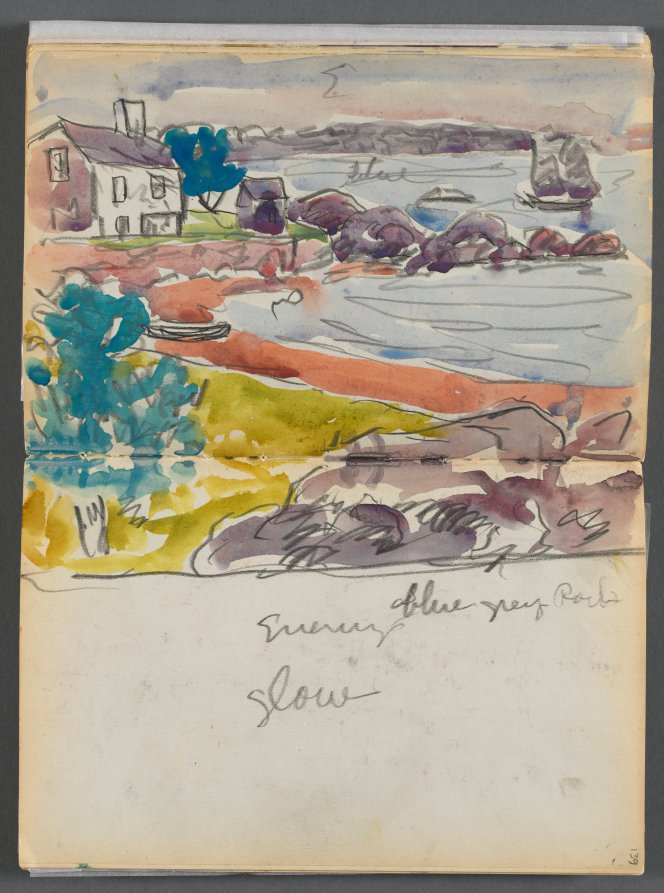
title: Sketchbook- The Granite Shore Hotel, Rockport, page 138 & 139: "Evening Glow"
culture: America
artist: Maurice Prendergast (American, born Newfoundland [now Canada], 1858–1924)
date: 1905–10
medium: graphite and watercolor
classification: Bound Volume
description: This sketchbook contains 72 pages of pencil drawings and 9 watercolors of Cape Ann. On the inside of the cover Prendergast wrote the address of the Granite Shore Hotel in Rockport, Massachusetts.